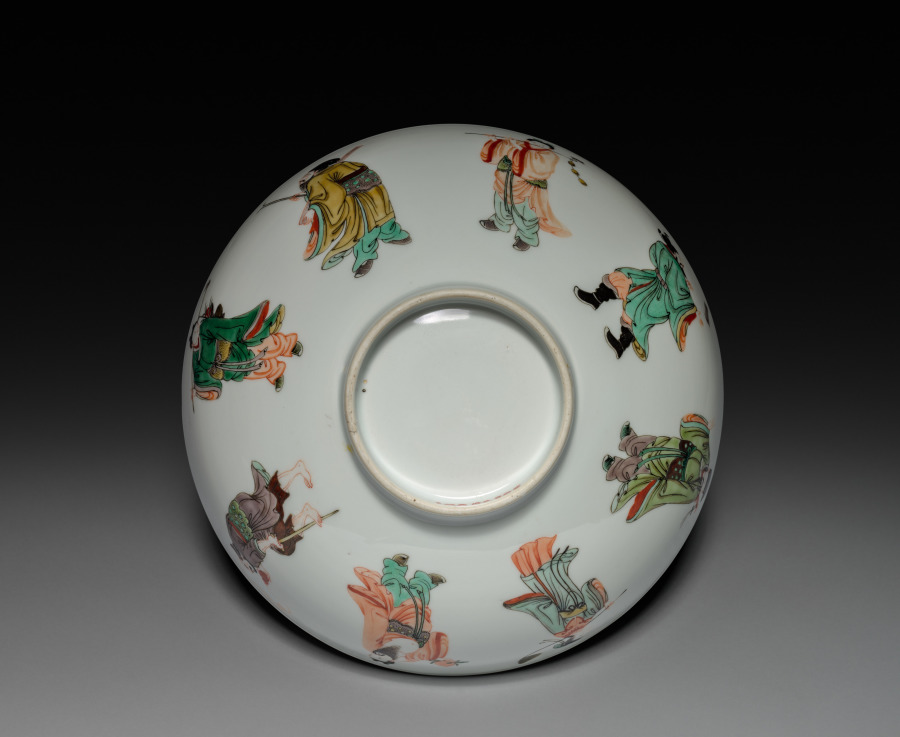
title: Bowl with Eight Immortals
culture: China, Jiangxi province, Jingdezhen kilns, Qing dynasty (1644-1911), Kangxi reign (1662-1722)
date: 1662–1722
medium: porcelain with famille verte overglaze enamel decoration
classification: Ceramic